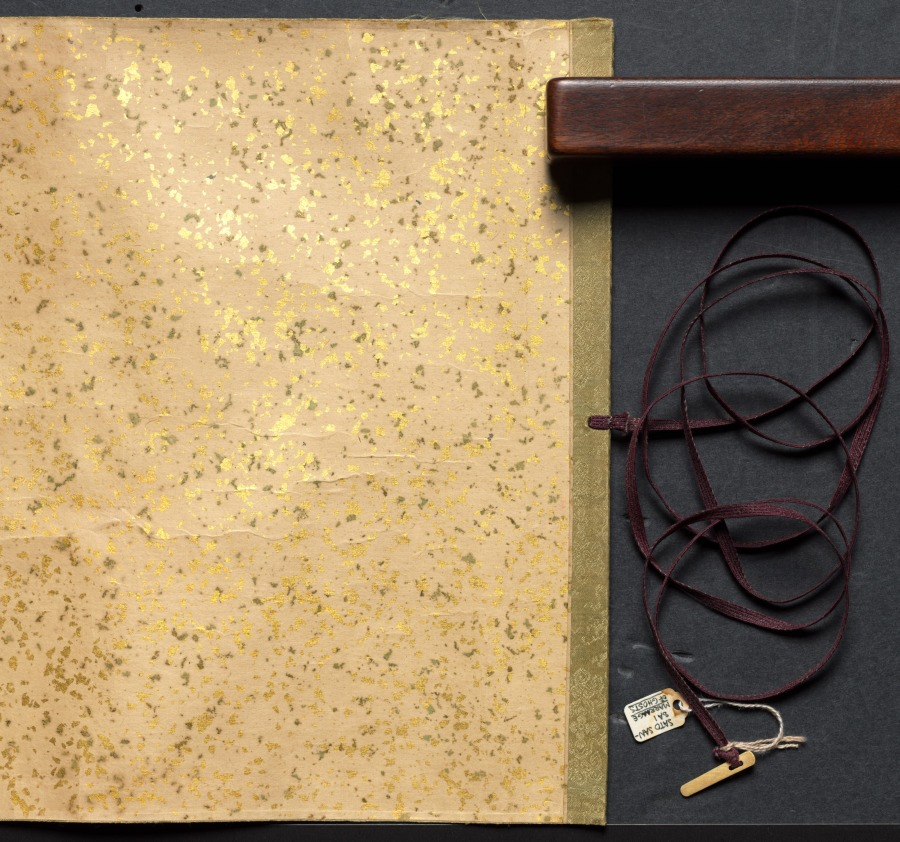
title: An Illustrated Marriage of Apparitions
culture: Japan, Edo period (1615–1868)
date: mid-1800s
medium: handscroll; ink and color on paper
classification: Painting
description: The matchmaking, engagement, wedding, and birth of the first child of two apparitions, or bakemono, literally "things that change," are illustrated in this whimsical, humorous handscroll. Japanese folklore abounds with such strange creatures, most famously represented in handscrolls featuring a procession of 100 supernatural monsters. Aside from a textual preface and cartouches indicating the content of the scenes, the tale is told visually. The artist and whereabouts of the original handscroll are unknown, but a number of other 19th-century copies by amateur painters exist in Japanese collections, attesting to its broad appeal.